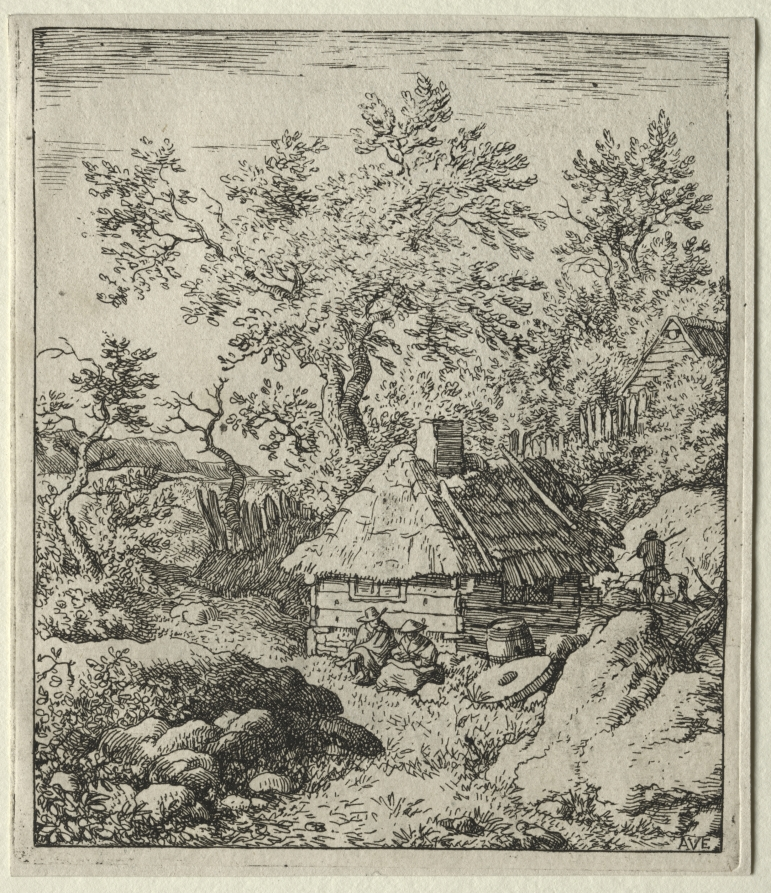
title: The Millstone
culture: Netherlands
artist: Allart van Everdingen (Dutch, 1621–1675)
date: 1636–75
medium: etching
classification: Print